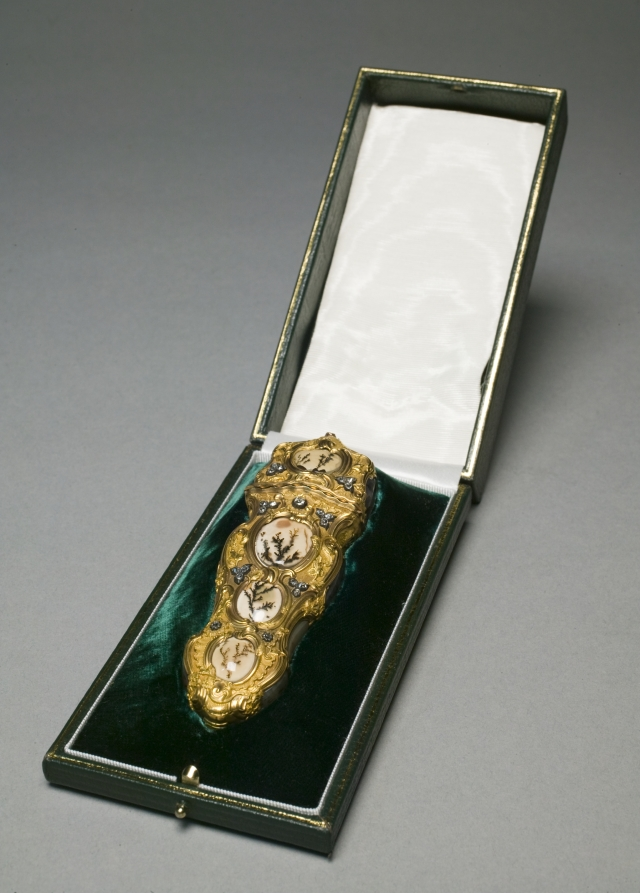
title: Vanity Case (Etui)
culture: England, 18th century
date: c. 1750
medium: gold, agate. diamonds, interior fitted with implements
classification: Miscellaneous